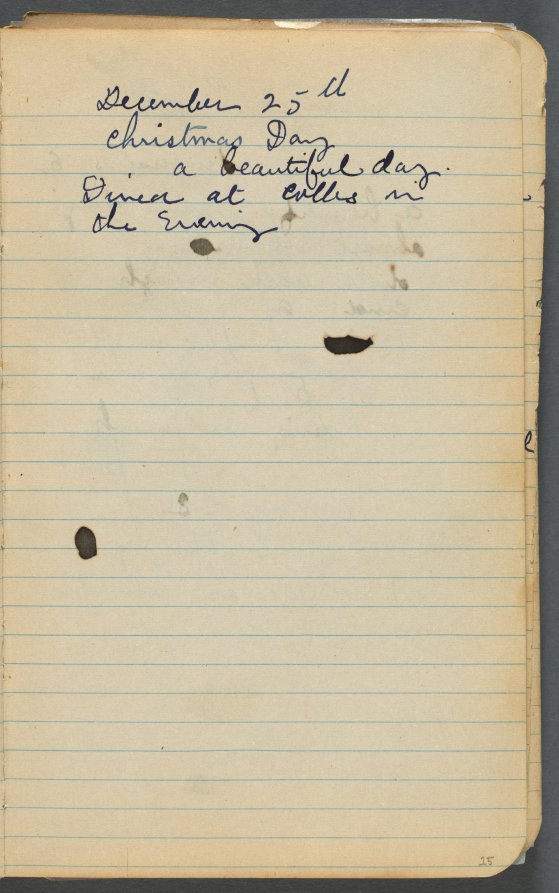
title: Sketchbook, page 015: Notes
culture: America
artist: Maurice Prendergast (American, born Newfoundland [now Canada], 1858–1924)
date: 1905–10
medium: graphite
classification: Bound Volume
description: This sketchbook contains 69 pages of drawings, a diary largely devoted to the state of the artist's health, and a three-page discourse on the nature of genius and ideas.